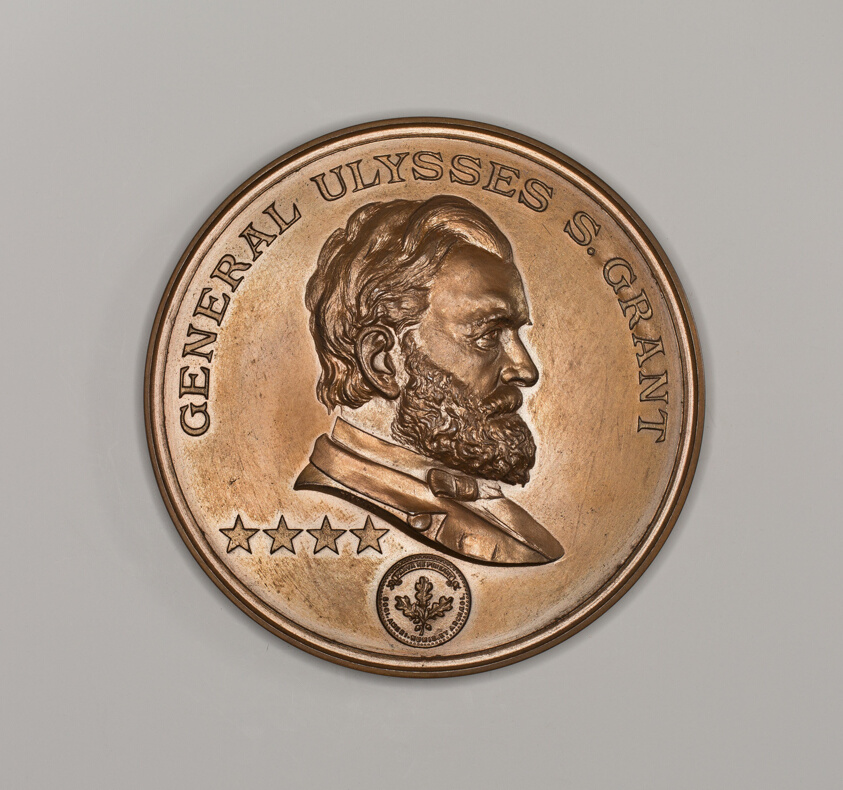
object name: Metalwork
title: Medal Commemorating Ulysses S. Grant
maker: Tiffany and Company (American, founded 1837); New York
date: 1897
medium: Bronze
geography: New York City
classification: medal; american arts; decorative arts